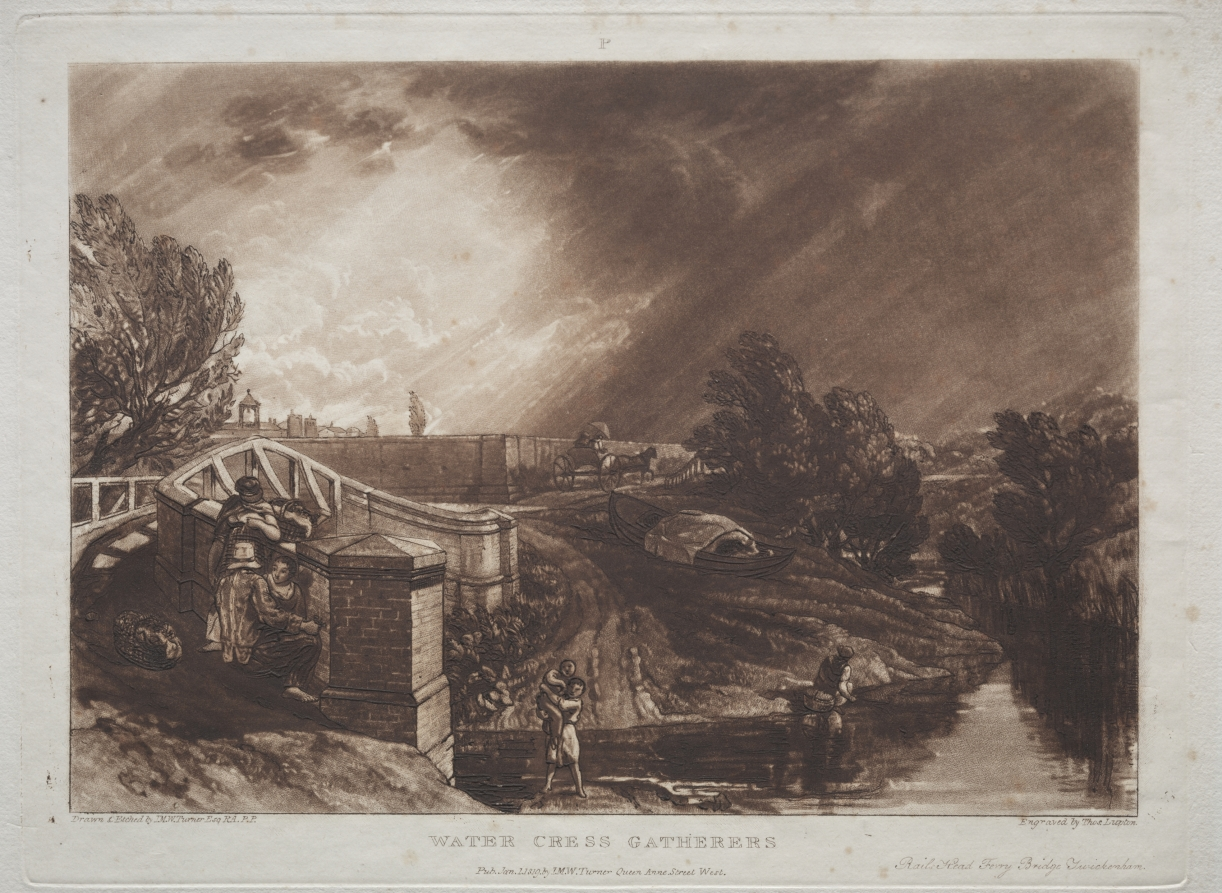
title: Liber Studiorum: Watercress Gatherers, Rails Head, Ferry Bridge, Twickenham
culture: England, 19th century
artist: Joseph Mallord William Turner (British, 1775–1851)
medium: etching and mezzotint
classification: Print